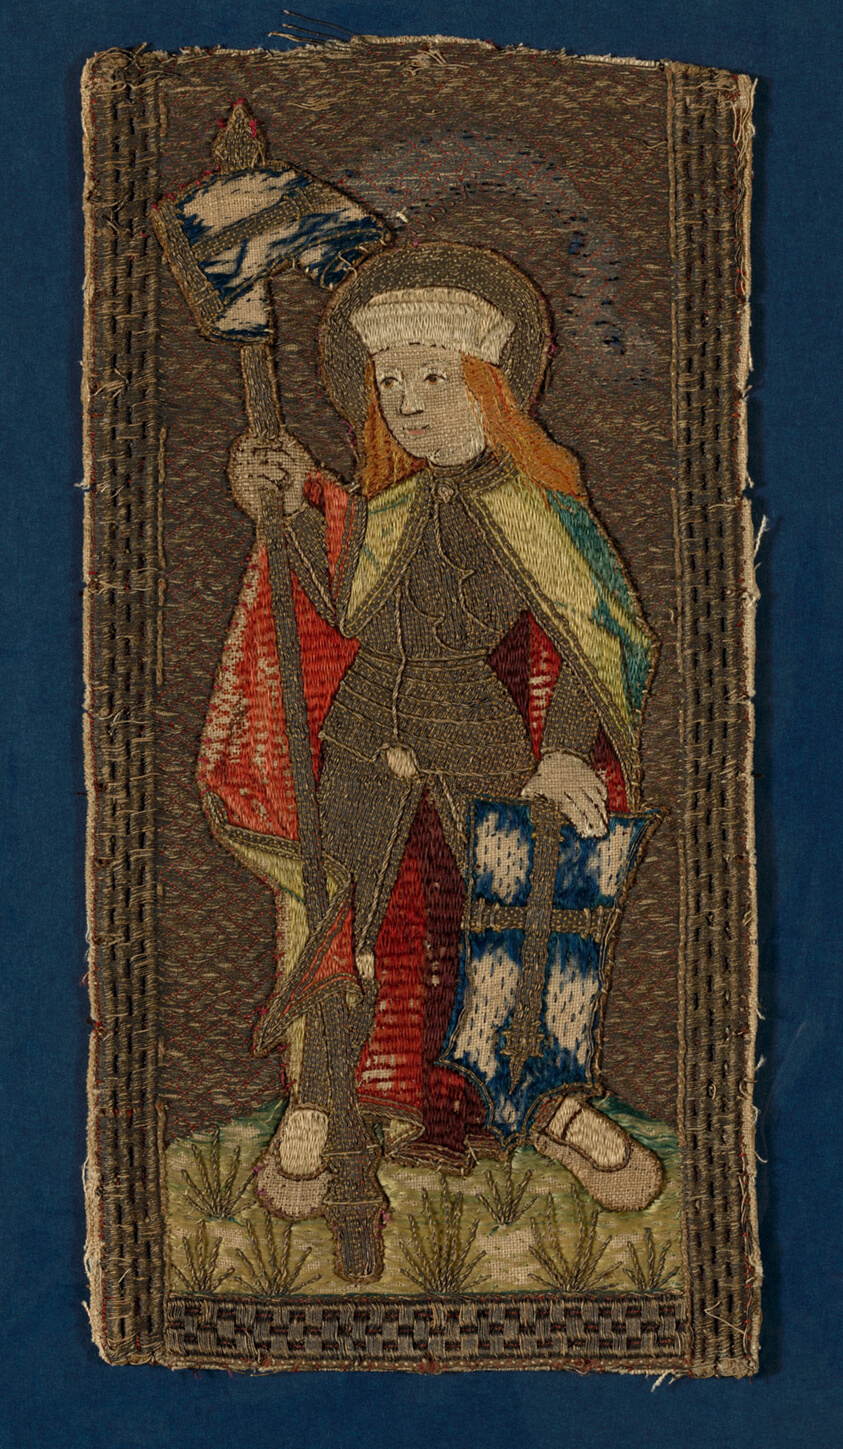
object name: Textile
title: Fragment (From an Orphrey Band)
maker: Germany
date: 16th century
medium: Linen, plain weave; appliquéd with linen, plain weave; embroidered with silk, gilt-animal-substrate-wrapped silk, linen, and wool in split stitches; laid work, couching, and padded couching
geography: Germany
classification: textile; needlework (visual works); liturgical